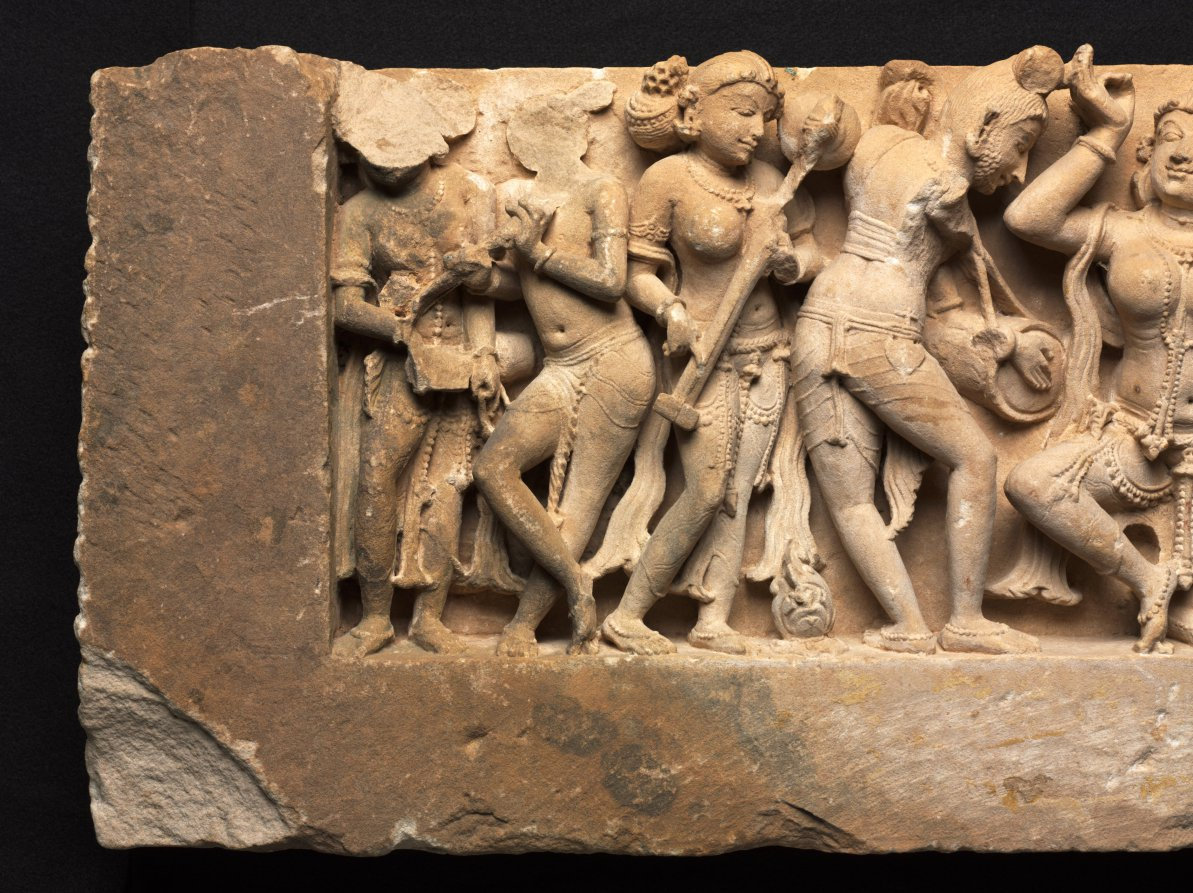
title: Frieze with Dancer and Musicians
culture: Northwestern India, Rajasthan, Sikar, Harshagiri, 10th century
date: c. 973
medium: sandstone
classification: Sculpture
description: A dancer, who strikes a pose in the center, is accompanied by a full orchestra of musicians in lively variegated poses. At the far left, a woman plays the cymbals, her mouth open in song. Twisting turning postures of figures wrought in high relief with little background space behind them are characteristics of Indian sculpture from the medieval period. Music and dance were important components of devotional temple activities; they were considered as pleasing to the divinity and attractive for devotees as the works of sculpture and architecture.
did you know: The twisting, dynamic postures of the musicians in this frieze may visually echo the joyful music they are playing together.